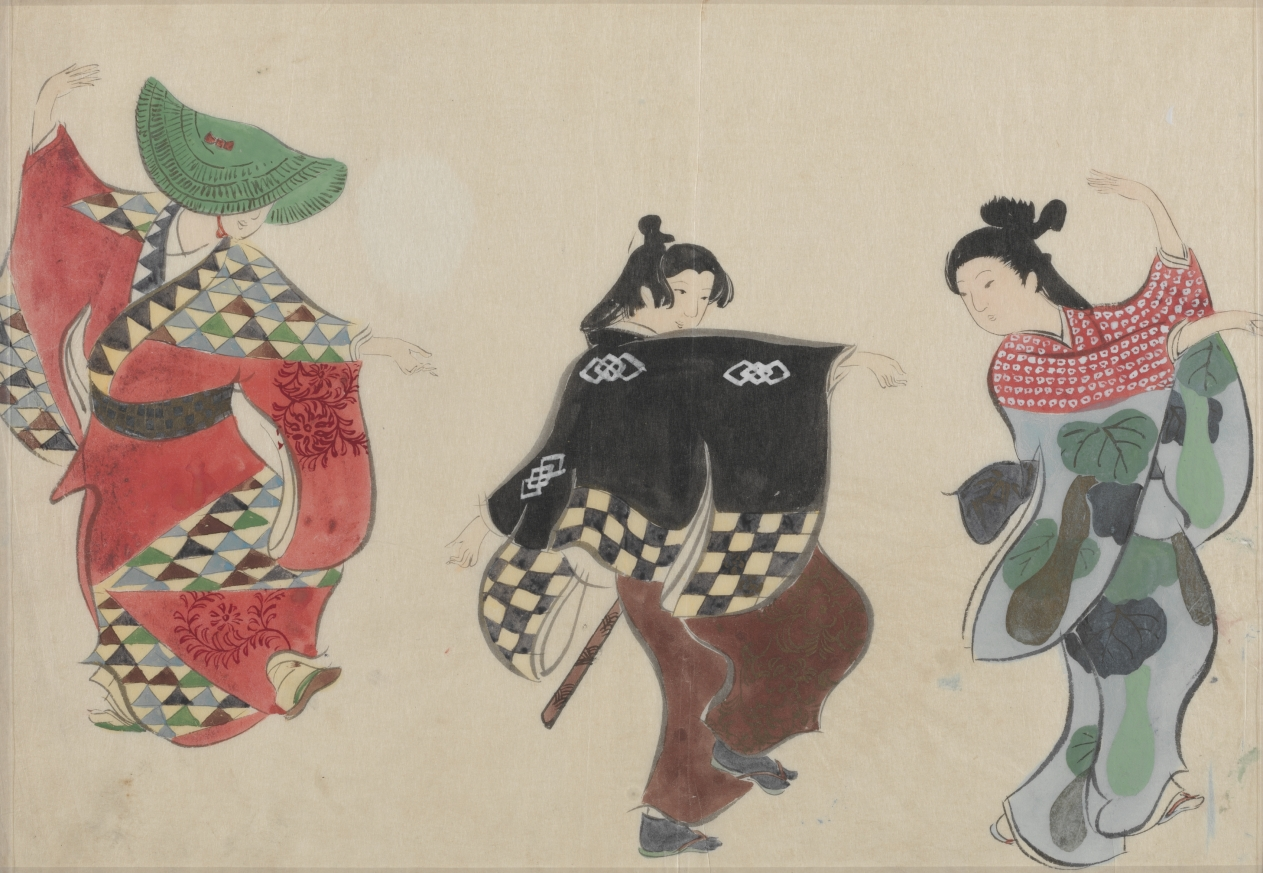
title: Flowers of a Hundred Worlds (Momoyogusa): Dancing (Odori)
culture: Japan, Meiji period (1868–1912)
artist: Kamisaka Sekka (Japanese, 1866–1942)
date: 1909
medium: ink and color on paper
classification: Drawing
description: Kamisaka Sekka made preparatory drawings for his Flowers of a Hundred Worlds series on tracing paper with ink and color. The freehand sketches are much looser than the finished, printed compositions.